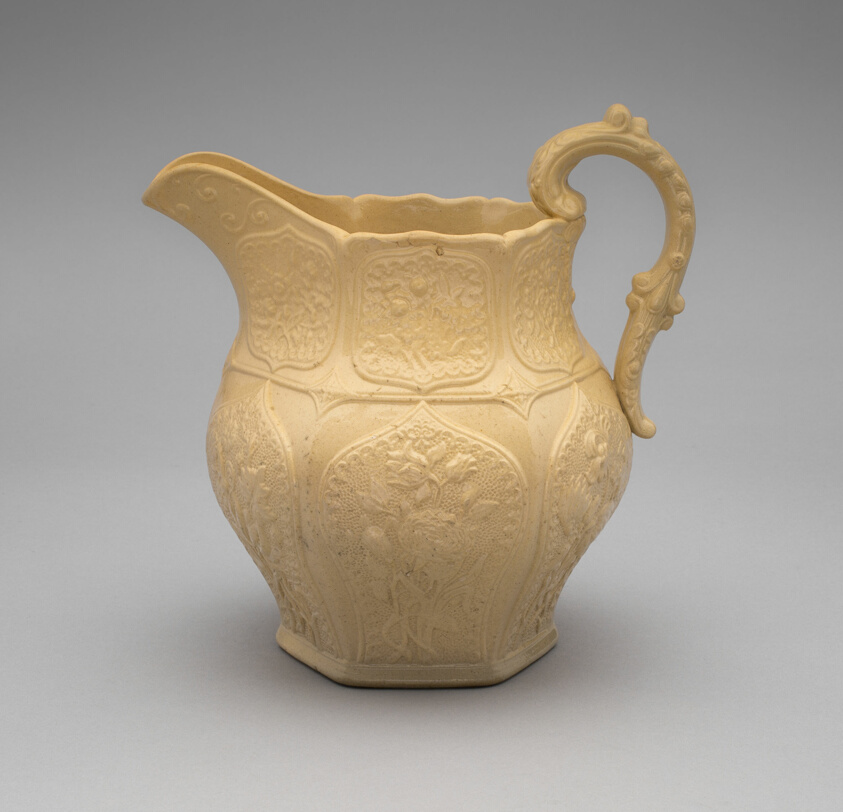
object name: Ceramics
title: Pitcher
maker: Desiged by Daniel Greatbatch (American, born England, active 1838-c. 1861); American Pottery Manufacturing Co. (1833-c. 1854); Jersey City, New Jersey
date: 1832–39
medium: Stoneware and glaze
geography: Jersey City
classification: pitcher (vessel); vessel; stoneware; pottery; ceramics; american decorative arts; american arts; decorative arts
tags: floral, foliage